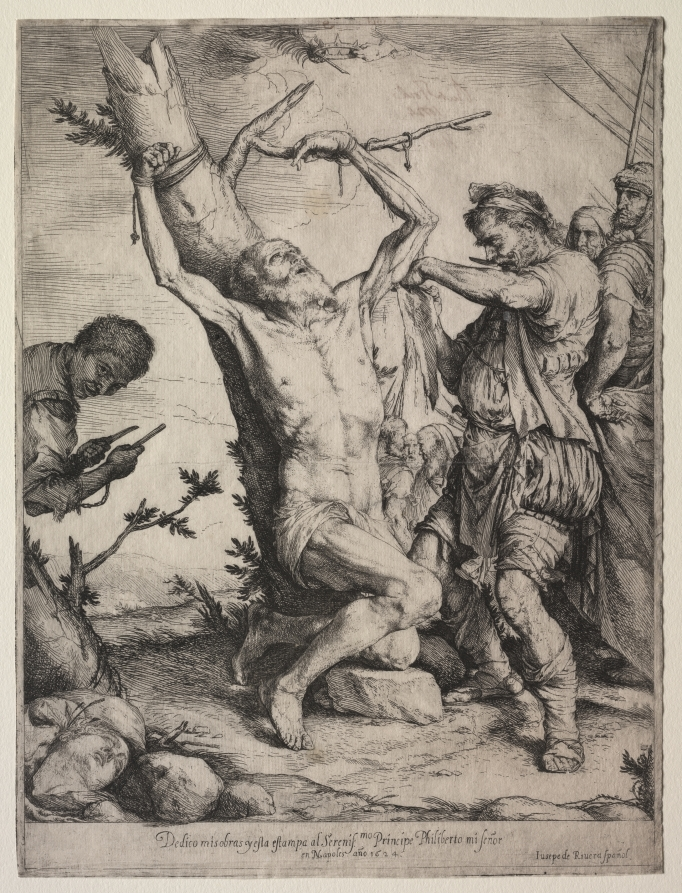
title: The Martyrdom of St. Bartholomew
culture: Spain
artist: Jusepe de Ribera (Spanish, 1591–1652)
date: 1624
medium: etching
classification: Print